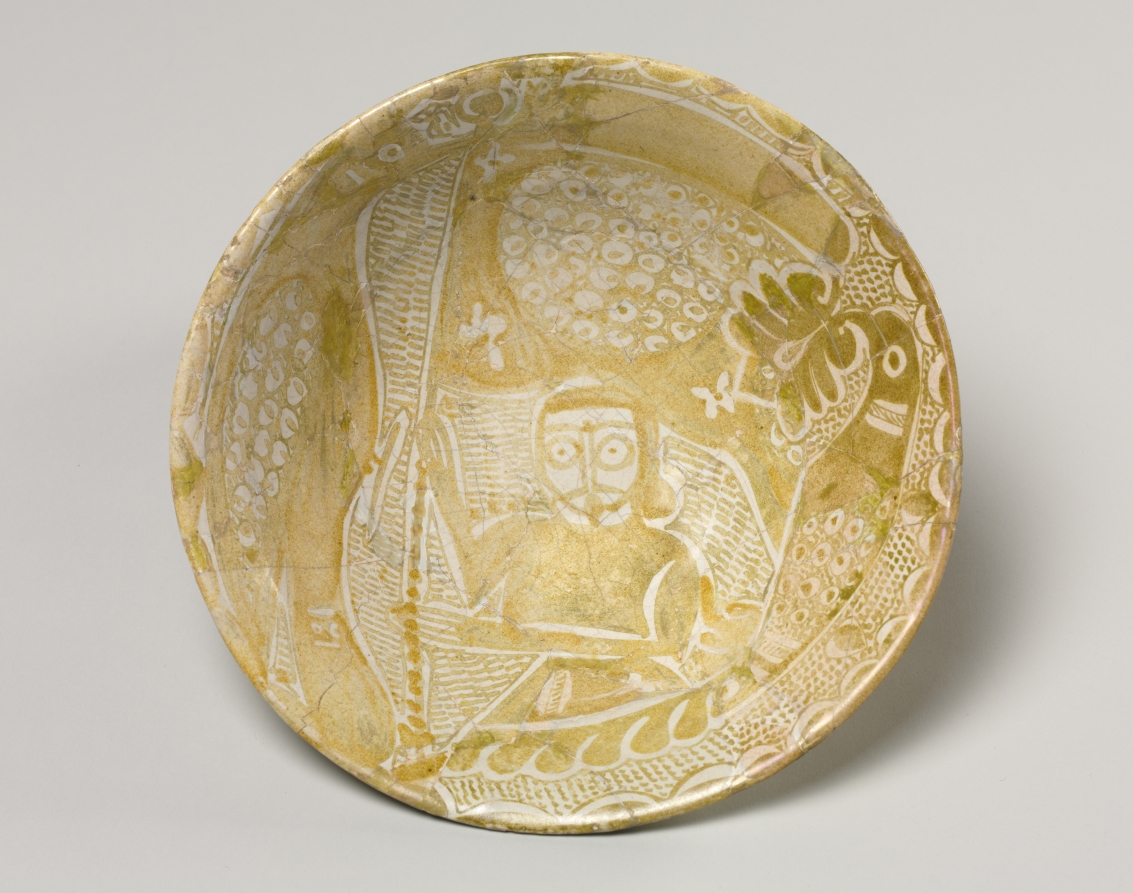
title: Luster Bowl with Man Holding a Banner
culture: Iraq, probably Baghdad, Abbasid Period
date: 900s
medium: earthenware with luster-painted design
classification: Ceramic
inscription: One undecipherable inscription on the foot ring on the outside.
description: This golden bowl displays a man holding a staff with a banner surmounted by a ball, crescent, and long streamer. He is flanked by two peacocks, one holding a palmette in his beak.